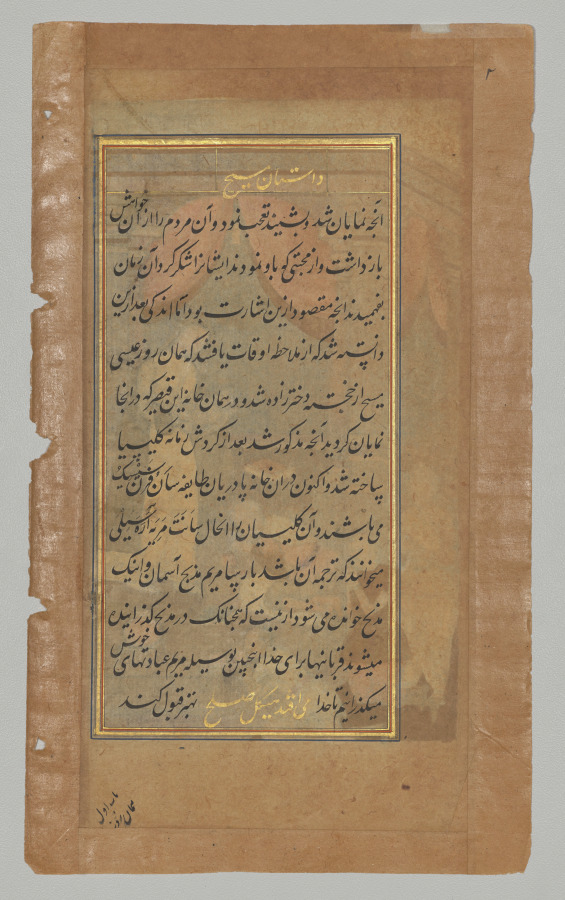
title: The Adoration of the Shepherds, from a Mirror of Holiness (Mir’at al-quds) of Father Jerome Xavier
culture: Mughal India, Allahabad, made for Prince Salim (1569–1627)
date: 1602–4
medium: Gum tempera, ink, and gold on paper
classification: Manuscript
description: Without reading the text, it would be difficult to identify the adorers as shepherds, because they are clothed as Portuguese merchants with ruffed collars and broad-brimmed hats. Mary stands with her divine newborn in a fenced enclosure, evocative of a sacred or royal space within a rather palatial setting, complete with pseudo-Ionic columns and heavy red draperies. The two books on the floor indicated to the Mughals that Christians, like Muslims, revere a definitive sacred scripture such as the Bible or the Koran.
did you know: The finishing details on this painting, such as two of the shepherds’ feet, the tile patterning, and probably arabesques, have not been completed.